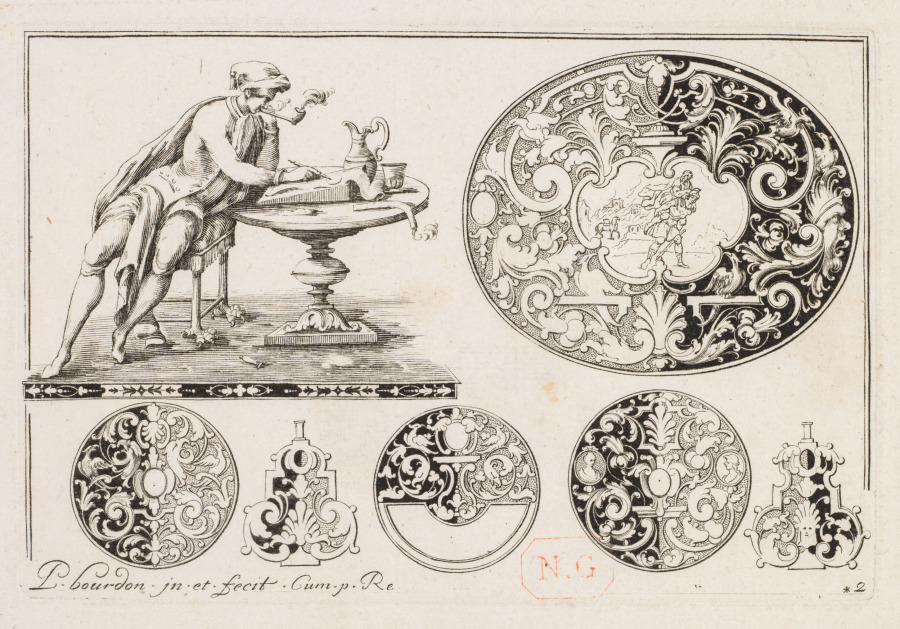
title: # 2 From " Livre second Cesais de Graubre " Second book of Engraved Design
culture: France, 18th century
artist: Pierre Bourdon (French)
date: c. 1703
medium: etching and engraving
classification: Print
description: The title page for this set of prints suggests that Bourdon’s designs are “useful for clockmakers, goldsmiths, chiselers, engravers, and other people.” These craftsmen who made ornamented objects sometimes consulted printed designs for inspiration. However, pattern prints similar to Bourdon’s also catered to aristocrats and wealthy professionals who pursued knowledge about styles and artists as a form of entertainment.